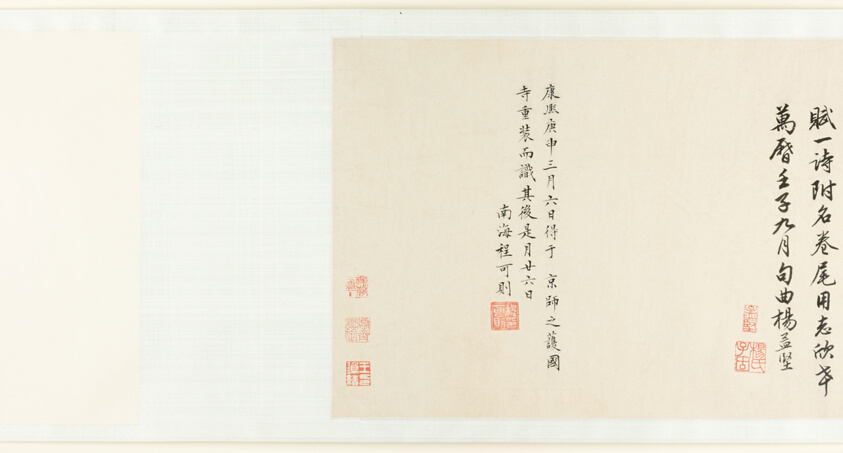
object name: Painting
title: Return to Stone Lake 石湖歸棹圖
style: Chinese (culture or style)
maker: Shen Zhou, 沈周; Chinese, 1427-1509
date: Ming dynasty (1368–1644), dated 1466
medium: Handscroll; ink on paper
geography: China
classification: handscroll; painting; asian art